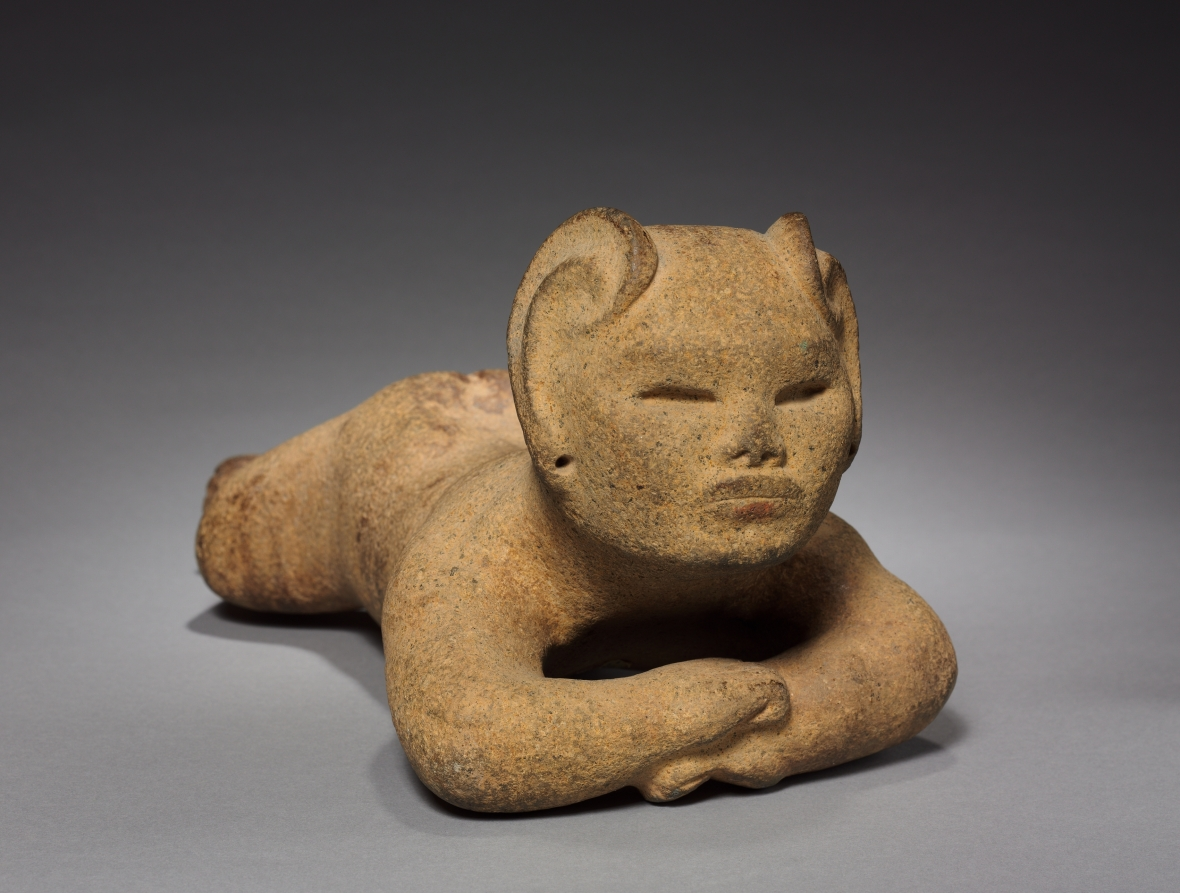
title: Reclining Figure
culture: Mexico, Gulf Coast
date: 300–600 CE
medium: stone, pigment traces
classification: Sculpture